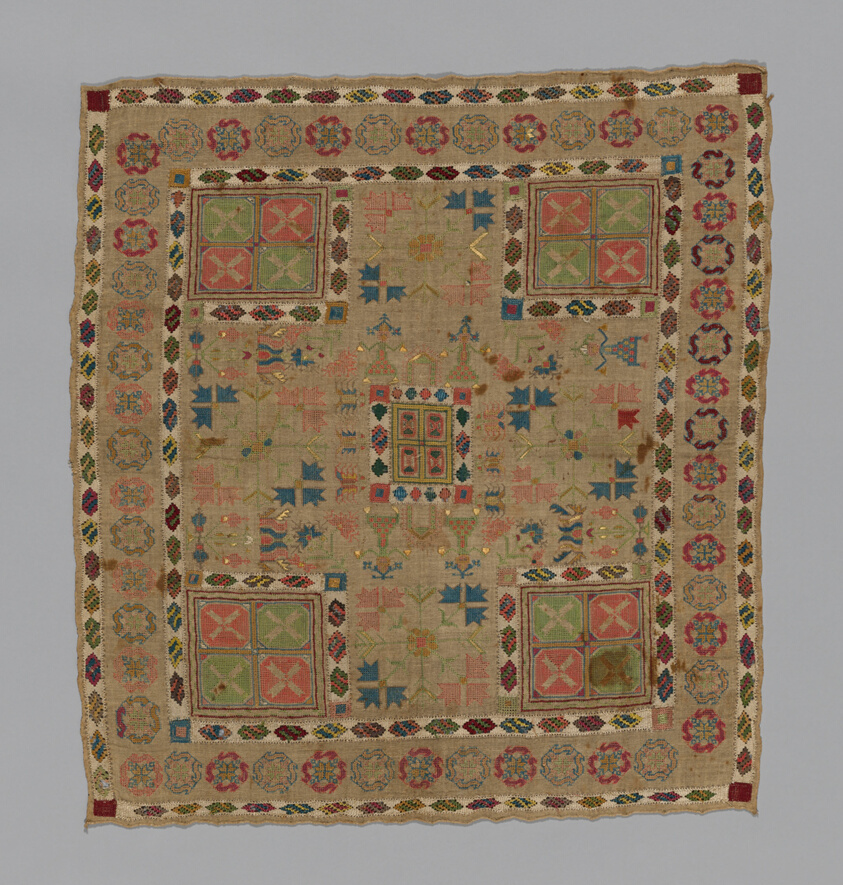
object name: Textile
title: Cover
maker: Turkey or Greece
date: 18th/19th century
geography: Turkey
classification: textile; needlework (visual works); weaving